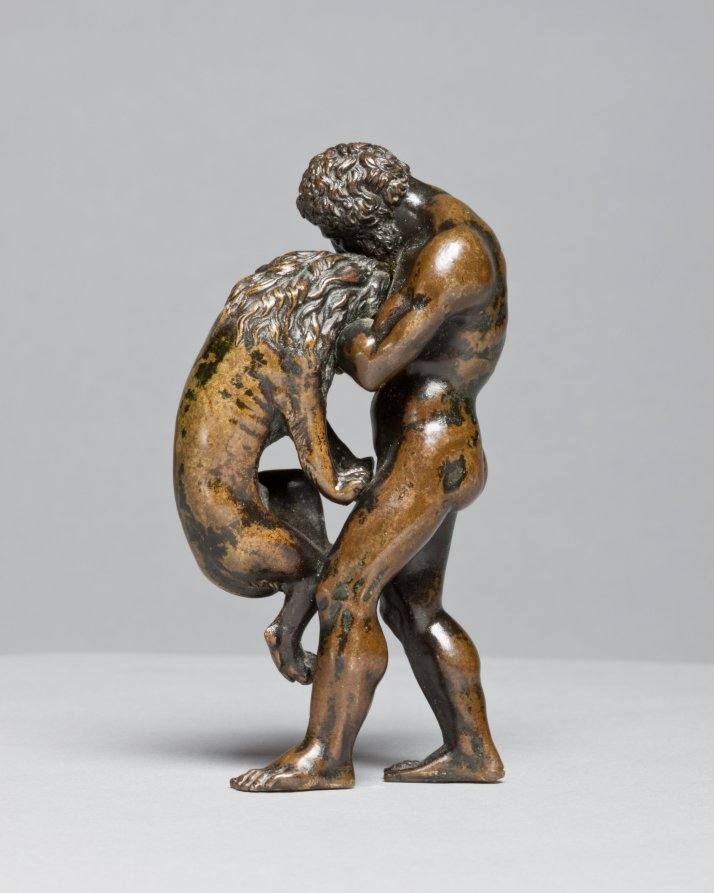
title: Hercules and the Nemean Lion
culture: Italy or France, 16th century or later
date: 1500s or later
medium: bronze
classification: Sculpture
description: The original owner of this work would have understood that this scene referred to the entire story of Hercules, the demi-god who had to accomplish twelve labors. The lion is named after the city of Nemea, near Corinth, a monstrous beast sent by the goddess Hera to wreak havoc on the area. After killing the lion, Hercules wore his pelt, commonly seen in other representations of the hero.